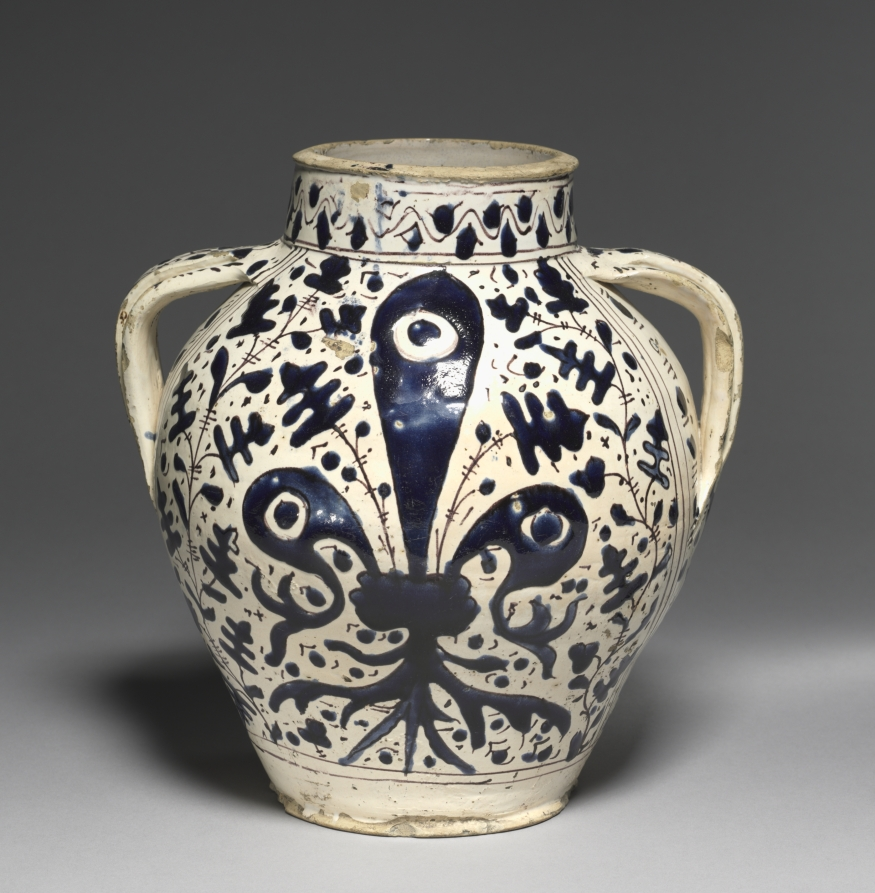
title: Two-Handled "Oak Leaf" Pharmacy Jar with Fleur-de-Lys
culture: Italy, Florence, 15th century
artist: workshop of Giunta di Tugio (Italian, c. 1382–1450)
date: c. 1430–1450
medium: tin-glazed earthenware (maiolica)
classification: Ceramic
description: Giunta di Tugio was the most important maiolica ceramist of his time in Florence. Di Tugio was trained in his father's workshop, which he took over following his father's death around 1419, managing it for the next thirty years. According to documents, by 1417 di Tugio was a member of the council of oliandoli, or oil merchants.